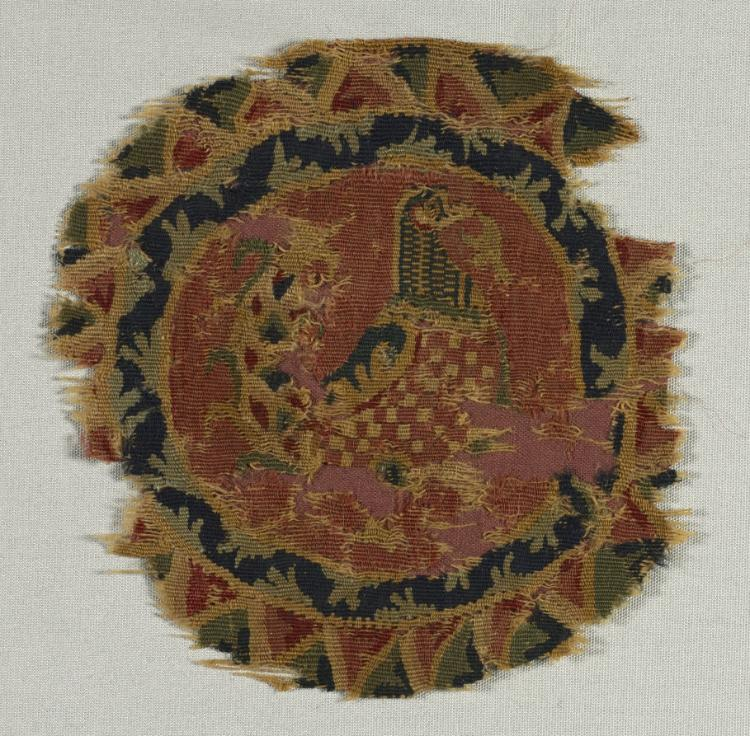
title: Roundel Fragment: Speckled-Breasted Bird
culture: Egypt ?, 8th century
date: c. 740 – 760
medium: tapestry weave: wool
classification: Textile